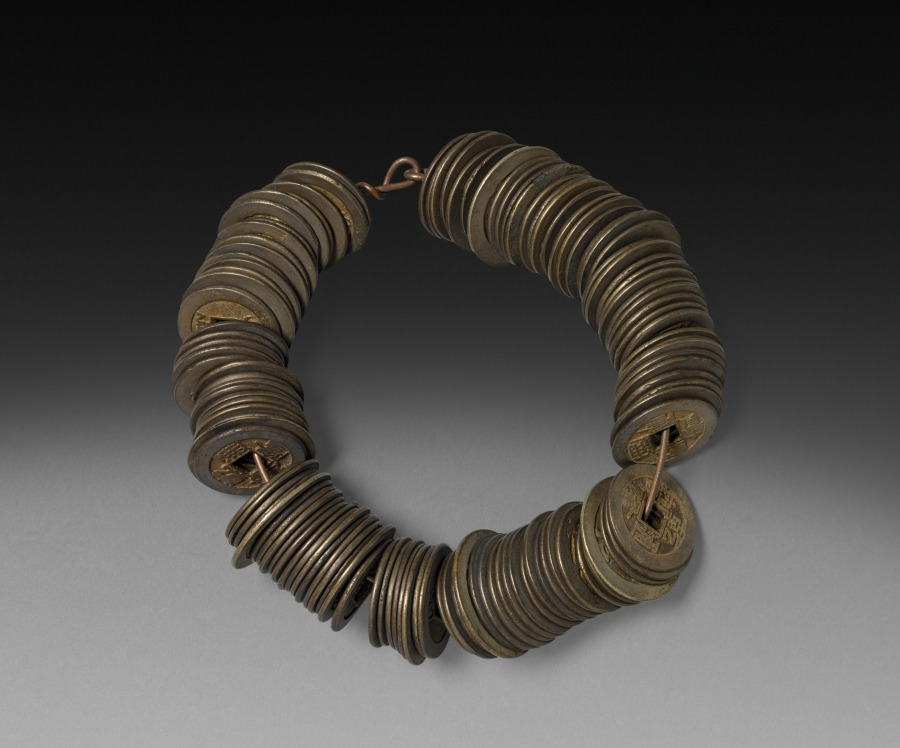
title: Coins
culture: China, Qing dynasty (1644–1911), Qianlong reign (1736–95)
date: 1736–95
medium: copper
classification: Coins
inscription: 乾隆通寳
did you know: This is a string of Chinese coins with square holes in the center.